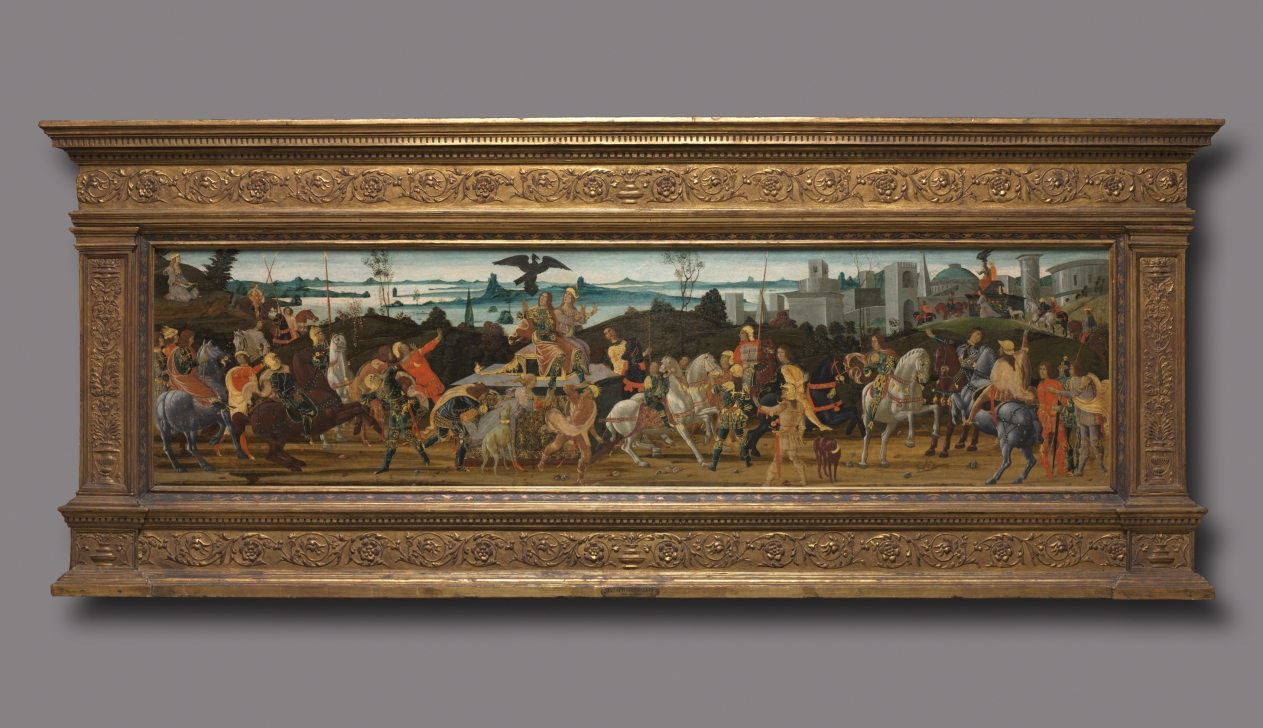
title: Tarquinius Priscus Entering Rome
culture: Italy, late 15th Century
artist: Jacopo del Sellaio (Italian, c. 1441–1493)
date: c. 1470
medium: tempera on wood, mounted on canvas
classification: Painting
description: Originally the front of a bridal chest, this panel was later removed and framed like a painting. At left, the Etruscan prophetess Tanaquil foresees her husband’s entry into Rome. En route, an eagle snatched his hat, then returned it as they approached the city, which Tanaquil interpreted as a good omen. Ancient triumphal processions, closely connected to ancient sarcophagi, were common subjects for bridal chests. Here Tanaquil is a model for a supportive, dutiful wife.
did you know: This painting utilizes continuous narrative; the same figures appear multiple times as the story unfolds from left to right.